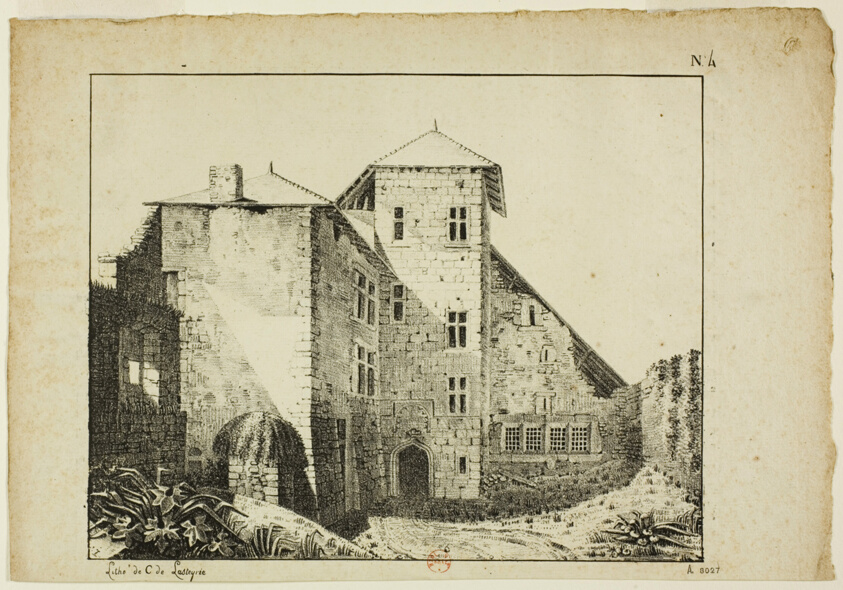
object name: Print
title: Tivoli, plate four from Views and Buildings of Italy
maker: Lameau (French, active 1803-1822); after Constant Bourgeois (French, 1767-1841); printed by Comte de Charles Philibert Lasteyrie du Saillant (French, 1759-1849)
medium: Lithograph in black on ivory laid paper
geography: France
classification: lithograph; print; prints and drawing